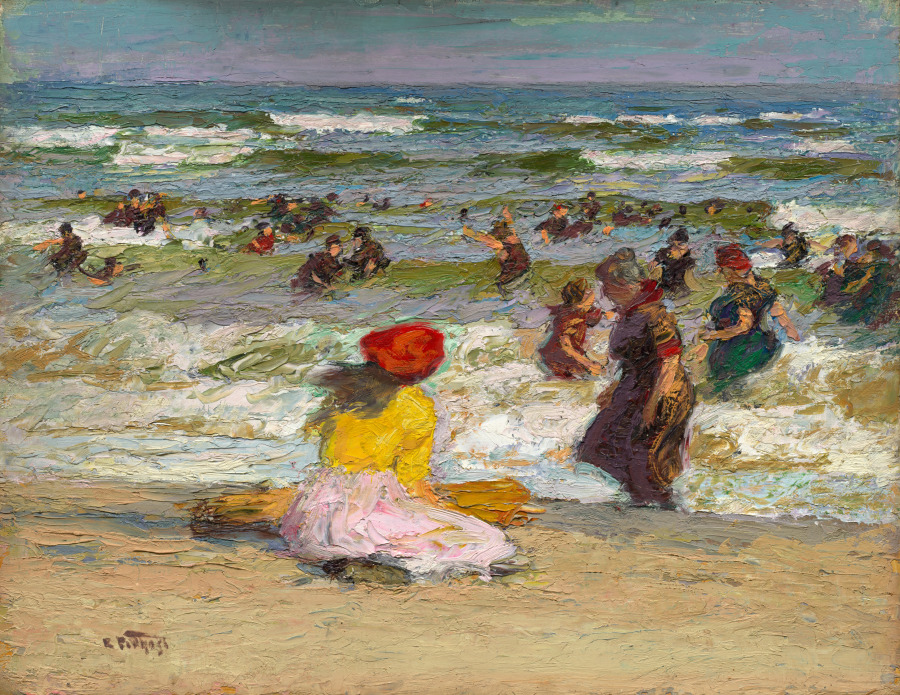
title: In the Surf (recto)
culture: America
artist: Edward H. Potthast (American, 1857–1927)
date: c. 1910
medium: oil on panel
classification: Painting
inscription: bottom left: E Potthast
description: Born in Cincinnati, Potthast studied in Munich and Paris before returning to the United States, where he began spending summers along the coast of New England. There he studied the carefree seaside activities of bathers and picnickers. Although he never married, he was particularly fond of painting young mothers and their children.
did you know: During the early 1900s, modesty dictated women’s bathing suit designs featuring long, loose-fitting skirts.